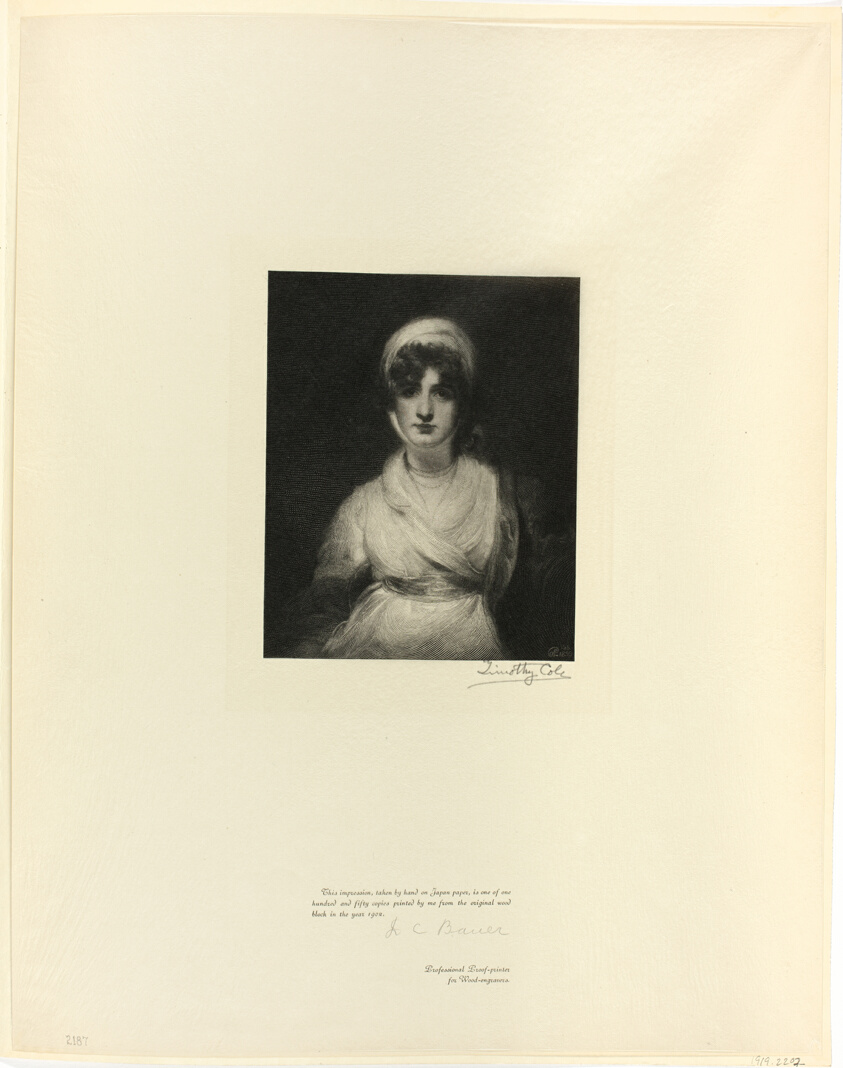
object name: Print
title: Portrait of Mrs. Siddons, from Old English Masters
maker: Timothy Cole (American, born England, 1852-1931); after Sir Thomas Lawrence (English, 1769-1830)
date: 1899, printed 1902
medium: Wood engraving on chine paper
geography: United States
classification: wood engraving; print; prints and drawing